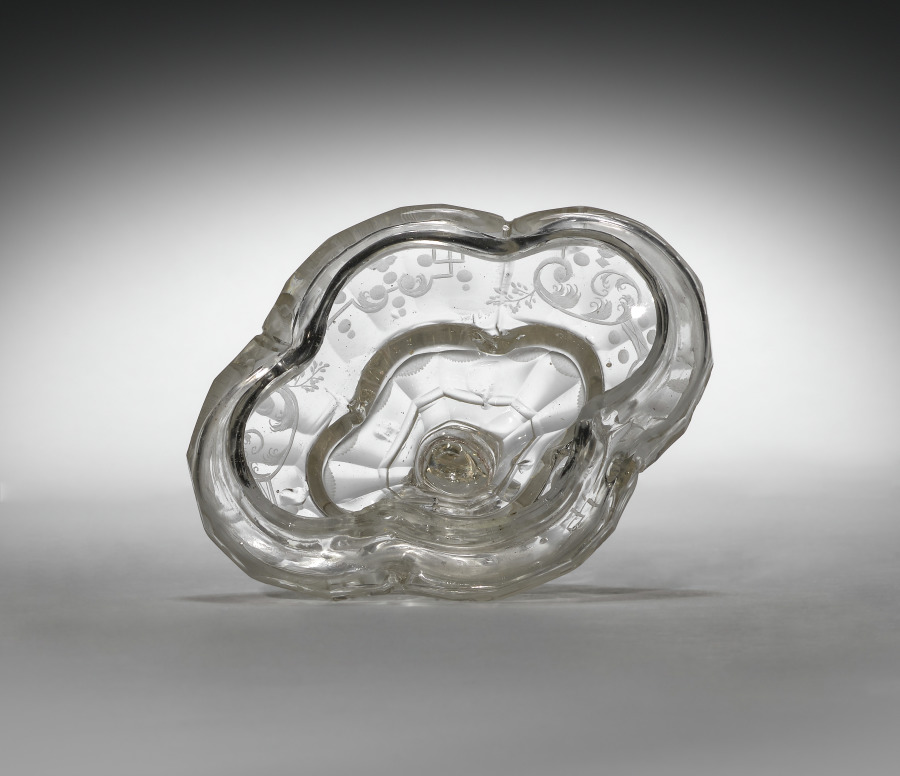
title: Cover for a Standing Cup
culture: Germany, Silesia, 18th century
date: c. 1725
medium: glass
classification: Glass